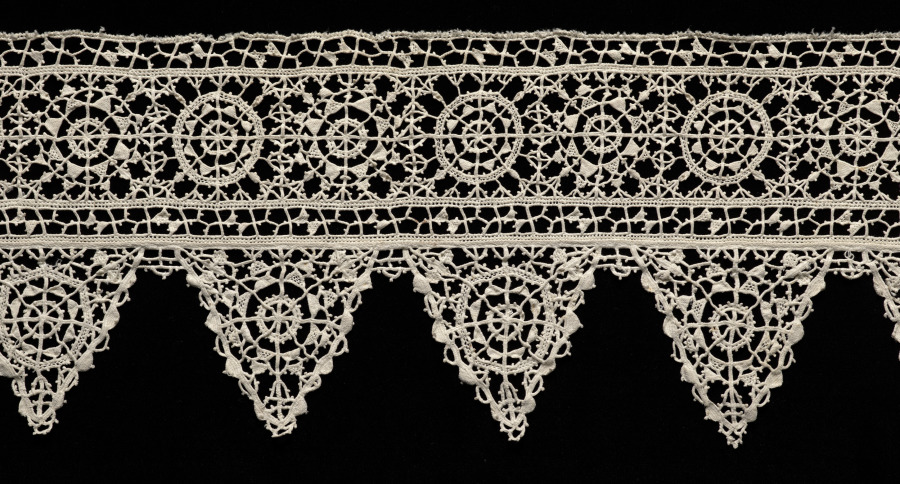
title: Lace Fragment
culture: Italy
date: 1500s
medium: Needle lace (reticella) insertion and edging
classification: Lace